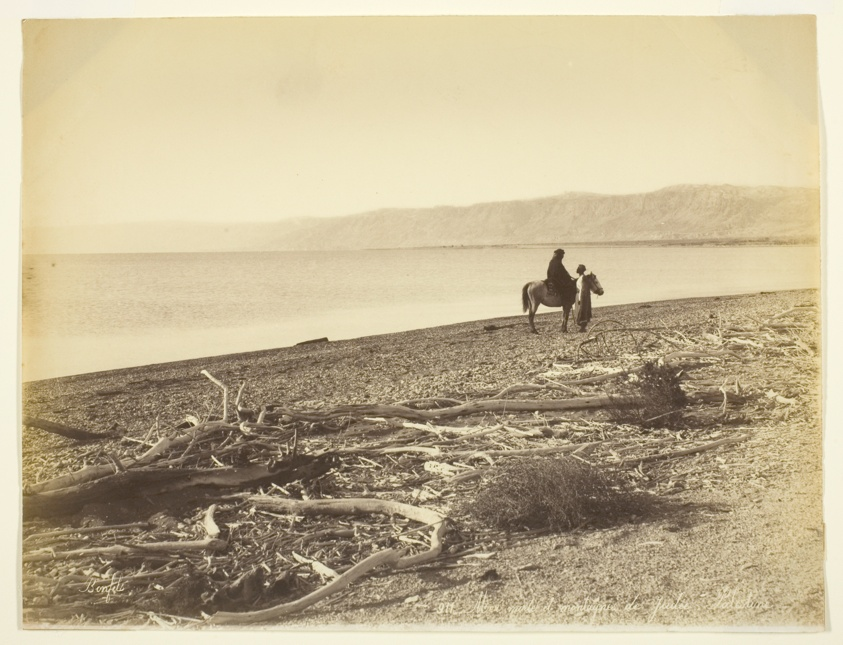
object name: Photograph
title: Mer Morte et Montagnes de Judée. Palestine (The Dead Sea and the Mountains of Judea, Palestine)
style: 19th century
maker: Félix Bonfils (French, 1831–1885)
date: 1875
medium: Albumen print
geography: France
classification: albumen silver print; photographic process; photography; photograph